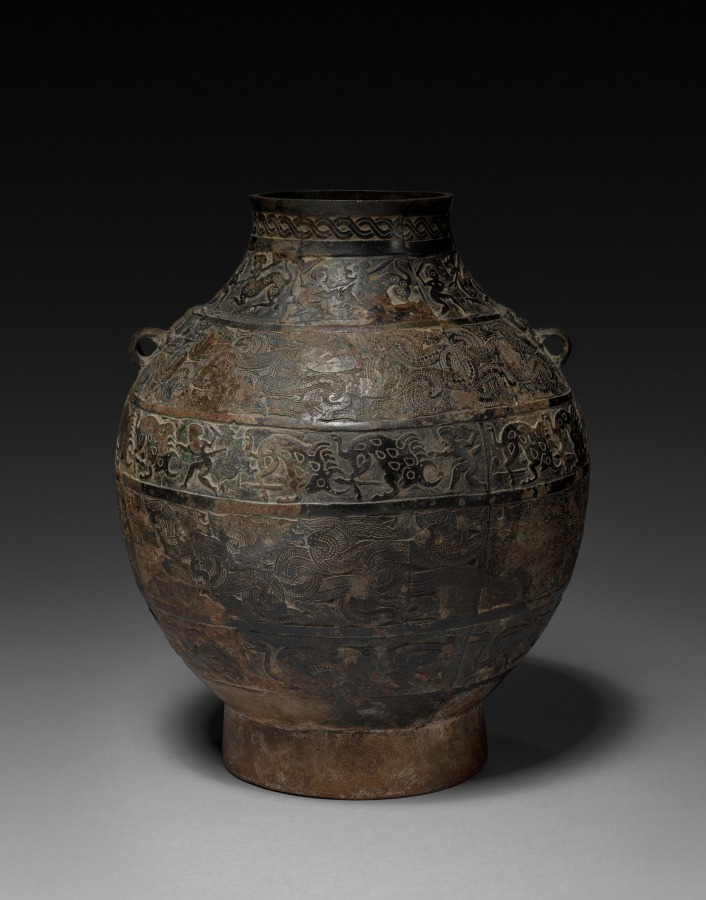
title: Hu (Jar)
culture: China, Eastern Zhou dynasty (770–256 BCE), Warring States period (475–221 BCE)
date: 481–221 BCE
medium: bronze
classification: Metalwork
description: The hunting scenes in flat, low relief on this vessel are among the earliest pictorial scenes in Chinese art, dating from the beginning of the Late Zhou period (481–221 BC). There are six horizontal bands of low relief designs across the body of the vessel. Each is composed of repeating motifs. The short slightly flaring neck has a narrow band of plait pattern, below which is a vivid hunting scene. The hunter holding a long spear and a sword faces off with a feline covered in circle patterns. The main body of the vessel is decorated with two wide bands of interlacing dragons, separated by a band with another hunting scene. This hunter faces two horned beasts whose rear leg has been pierced by a spear. The repeating pattern in the lowest band features two long-legged birds and a small fish.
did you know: On the vessel’s shoulders are applied taotie masks from which stem vertical loops for holding the vessel possibly with a rope.